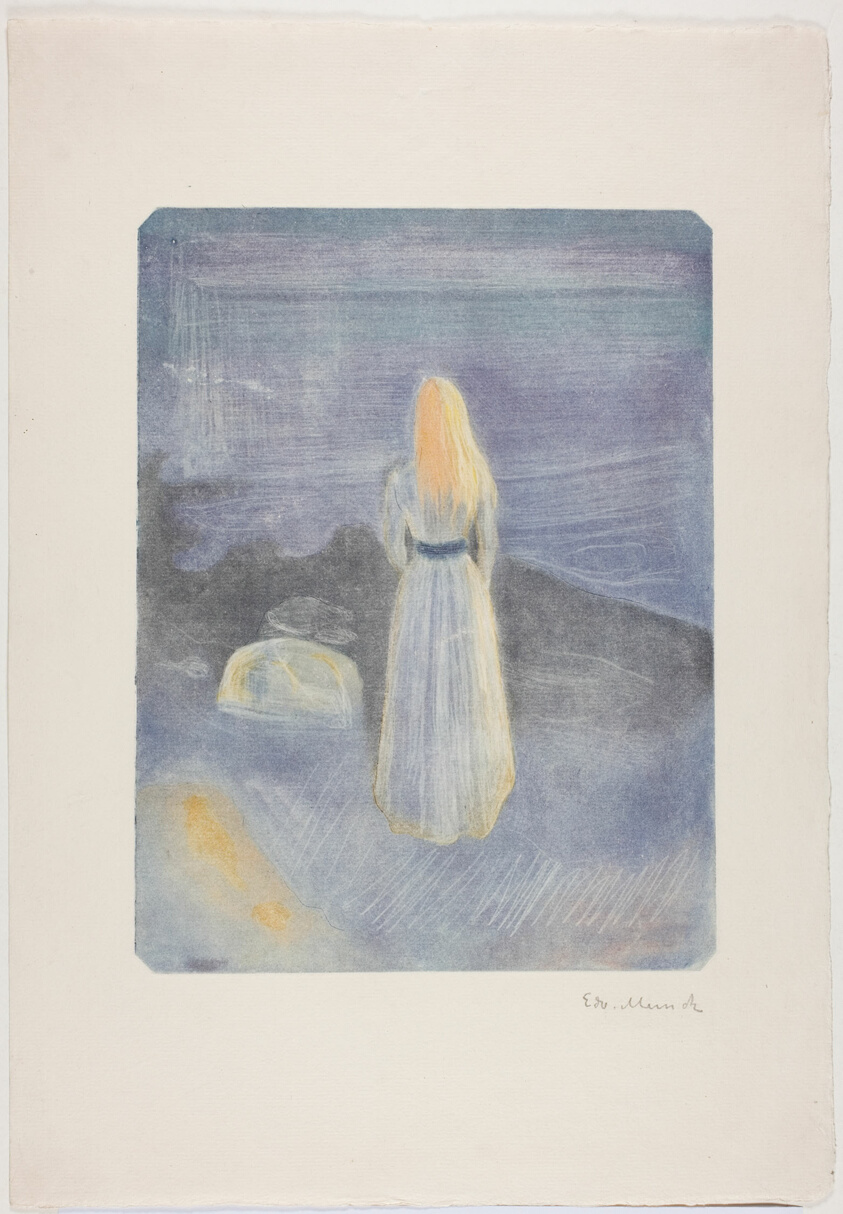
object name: Print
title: Young Woman on the Beach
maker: Edvard Munch (Norwegian, 1863-1944)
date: 1896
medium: Burnished aquatint and drypoint in purple, blue, gray and yellow, inked à la poupée, on cream laid Arches paper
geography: Norway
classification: aquatint; print; prints and drawing